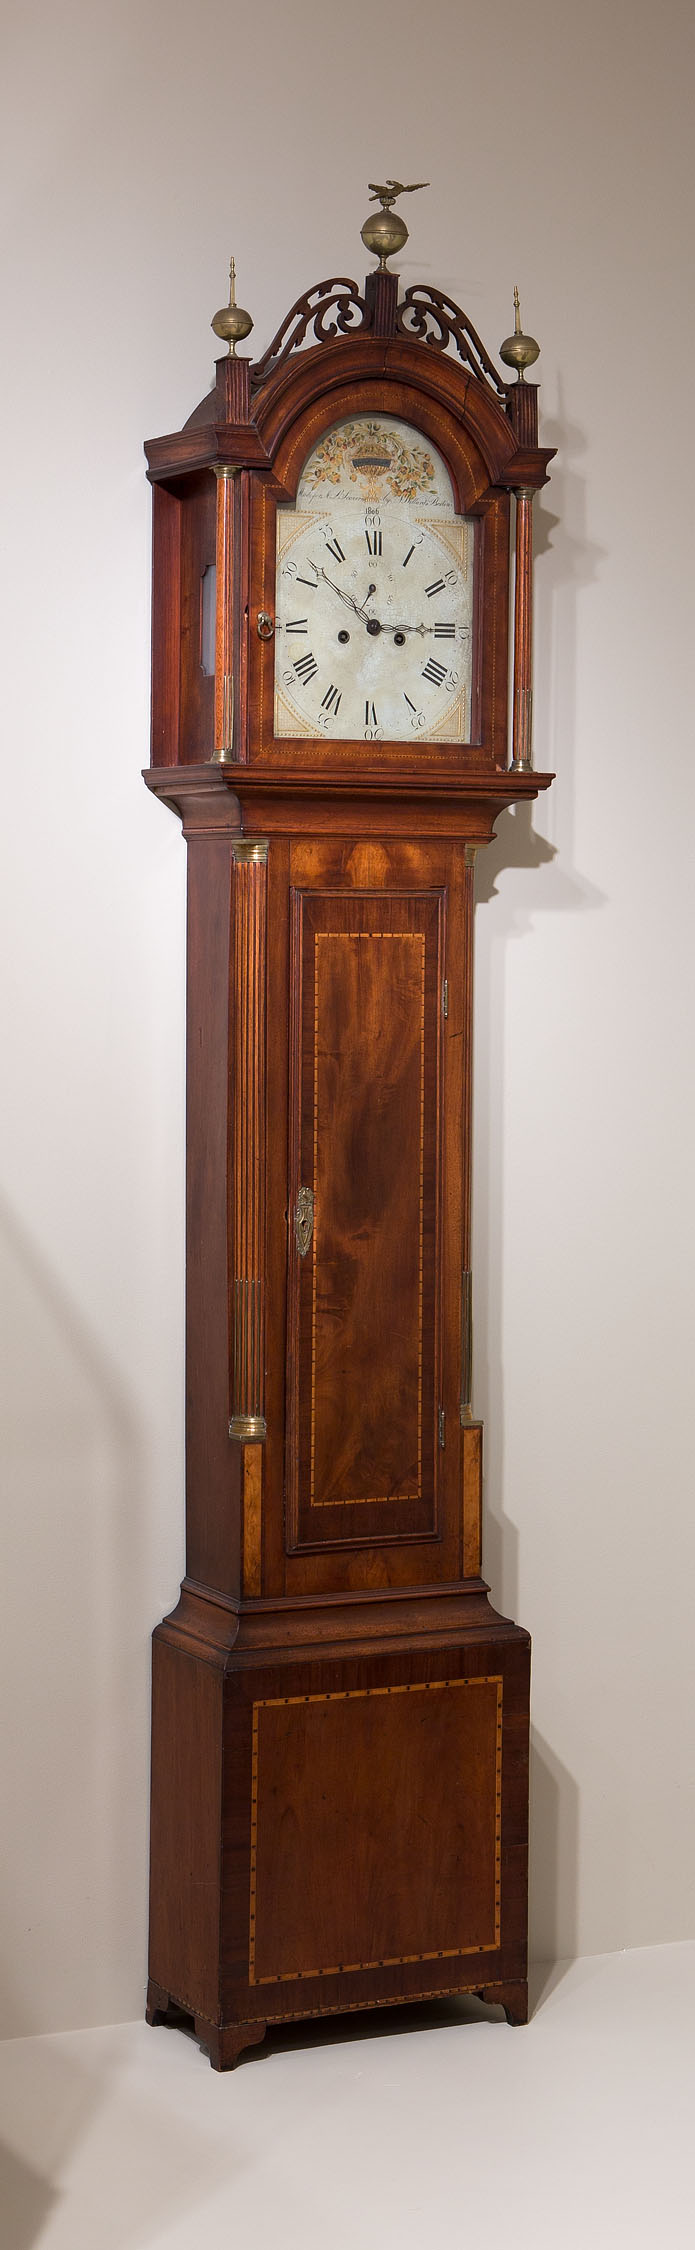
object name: Decorative Arts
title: Tall Case Clock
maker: Works by Aaron Willard; American, 1757–1844; Boston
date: 1806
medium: Mahogany and white pine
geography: Boston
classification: case furniture; furniture; american decorative arts; american arts; decorative arts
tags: furniture